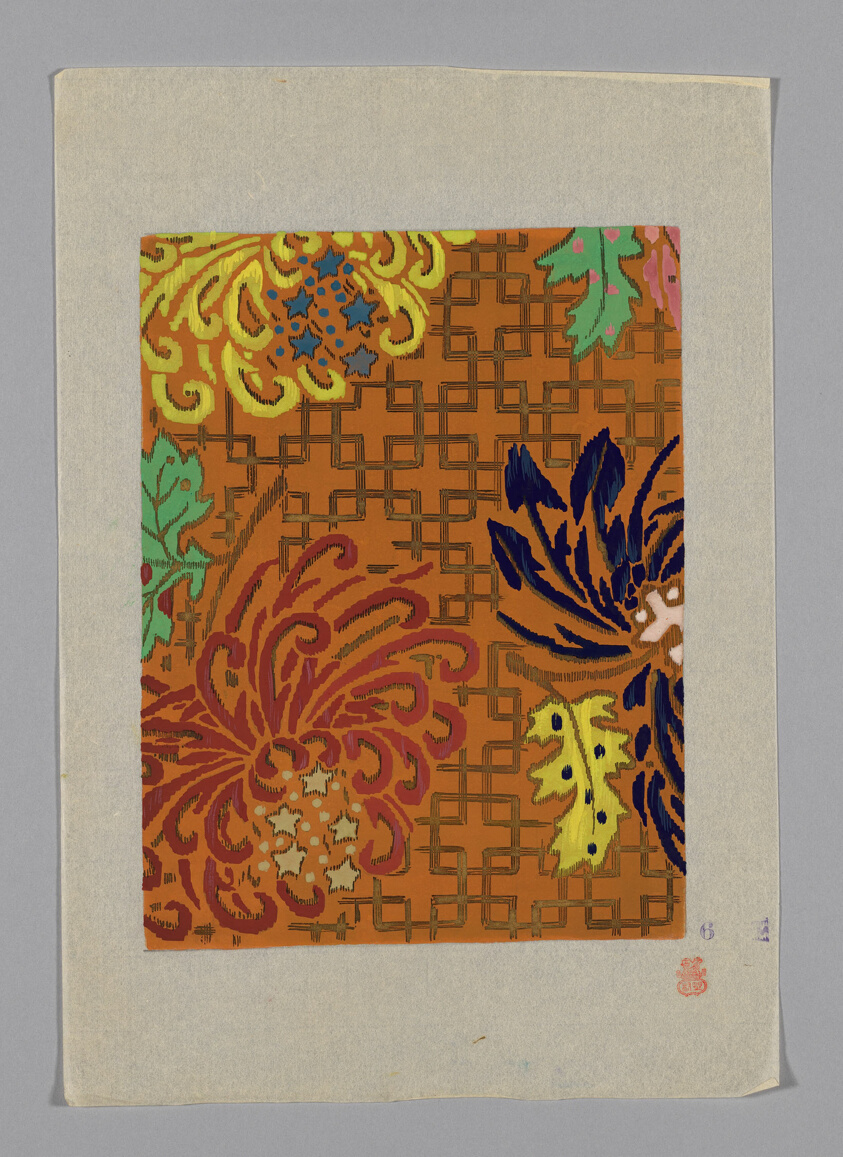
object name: Drawing and Watercolor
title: Design on Paper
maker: Japan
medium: Paper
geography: Japan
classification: textile; accessory - paper design; paper; watercolor